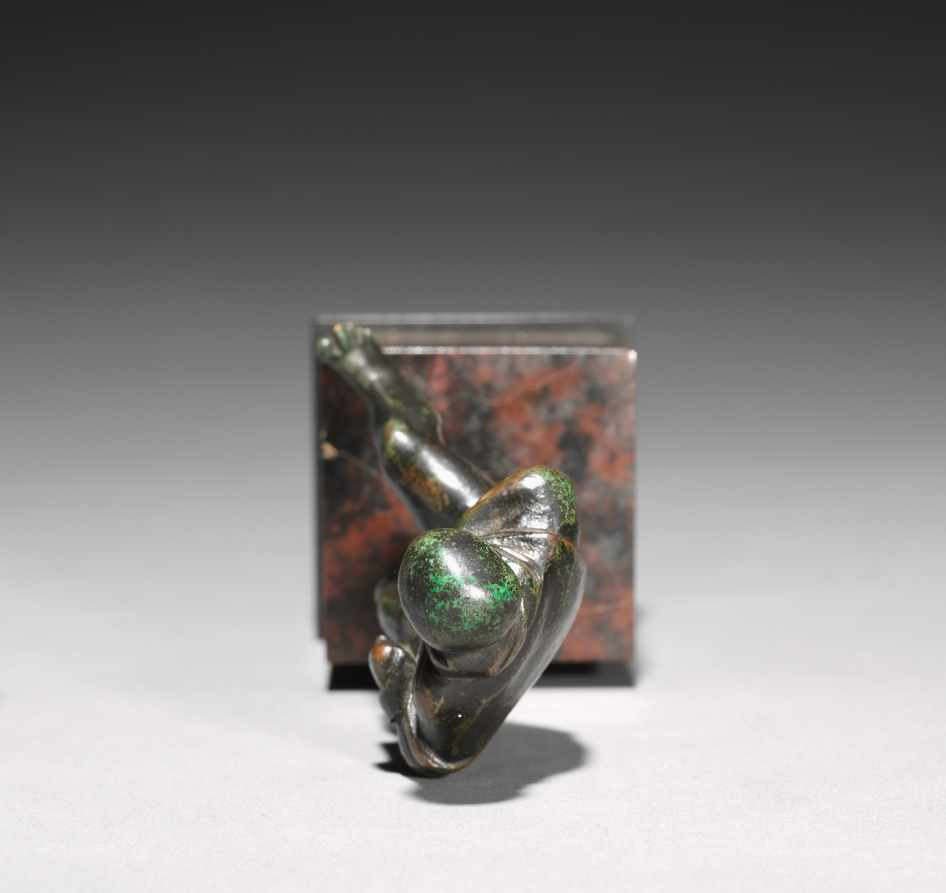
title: Dancing Boy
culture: Northern Italy, early 16th century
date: c. 1500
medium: bronze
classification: Sculpture